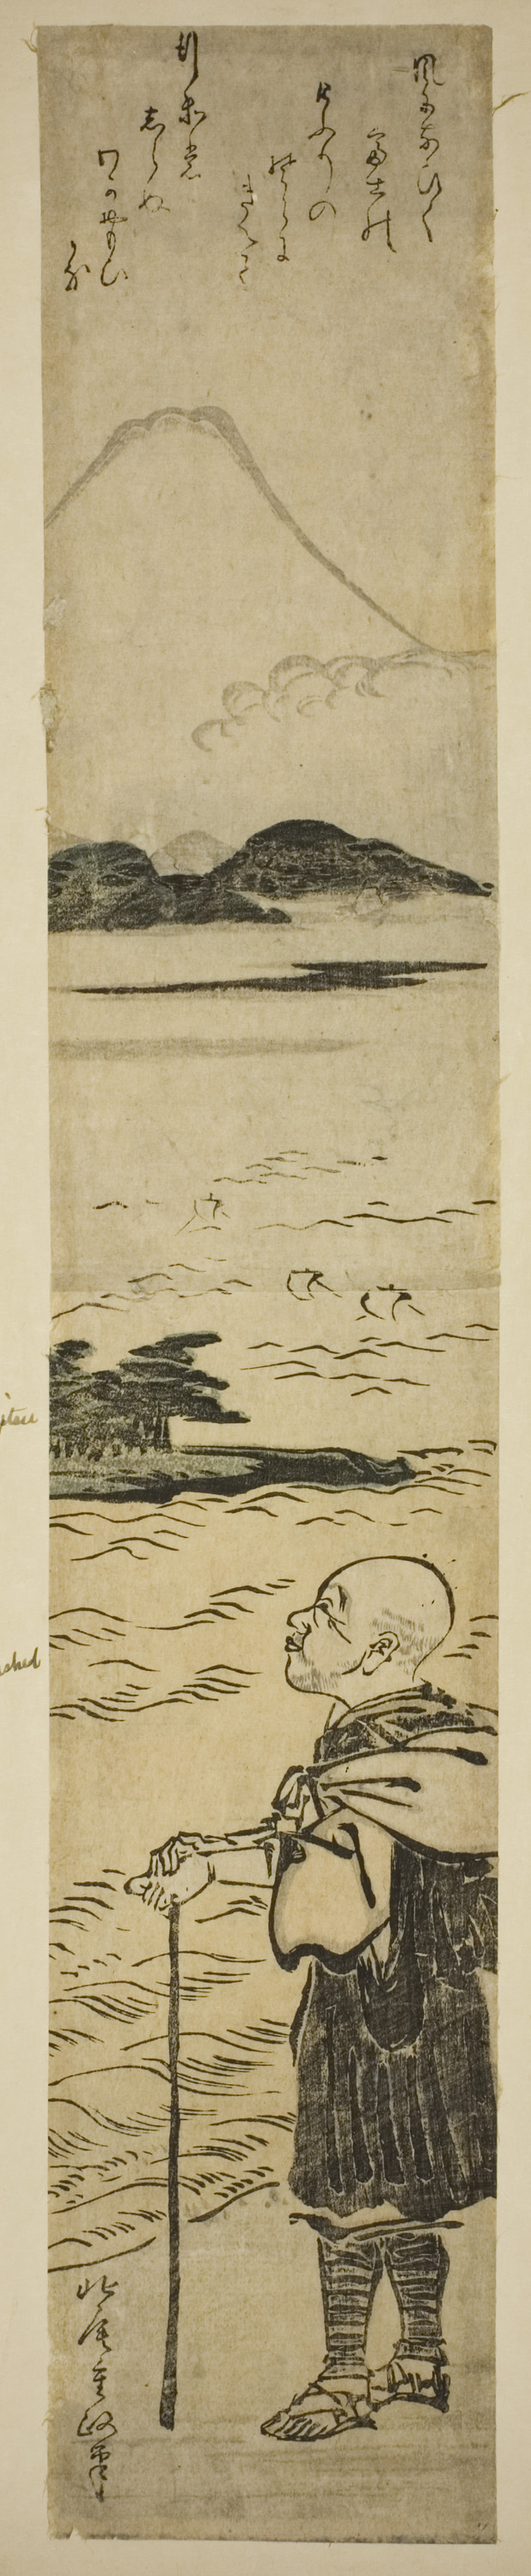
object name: Print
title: Priest Saigyo Contemplating Mount Fuji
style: Japanese (culture or style)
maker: Kitao Shigemasa (Japanese, 1739-1820)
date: c. 1770s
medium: Color woodblock print; hashira-e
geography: Japan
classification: woodblock print; print; asian art